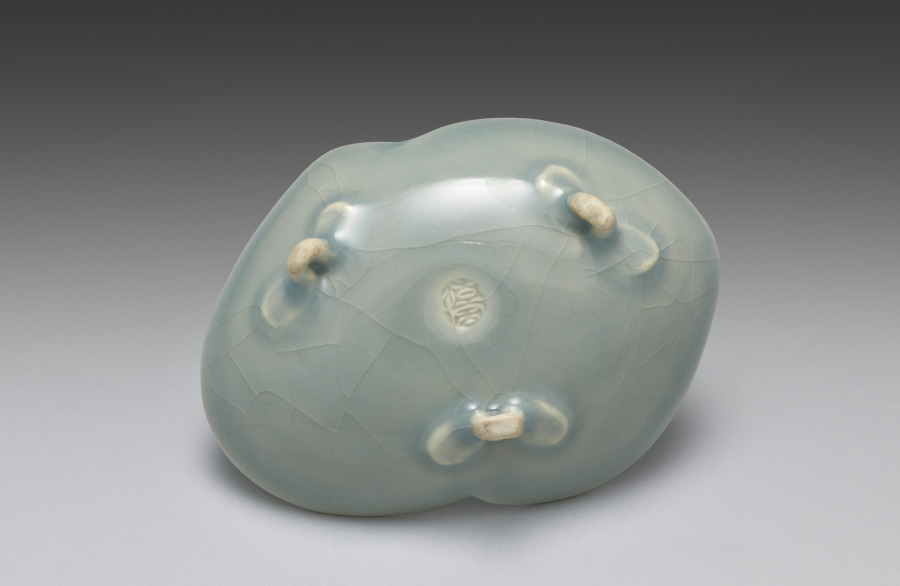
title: Dish from Saucers with Matching Shells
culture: Japan, Meiji period (1868–1912)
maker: Seifū Yohei III (Japanese, 1851–1914)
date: 1893–1914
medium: Porcelain with molded design and green crackled glaze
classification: Ceramic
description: Yohei III’s main output for his sophisticated clientele was in the form of tea sets and dining sets. He created a range of dishes in green glazes. He often produced in pairs, sets of five, or sets of ten. The set of five dishes with a more complex form is described as having a “water-colored glaze” (mizuiroyū). These are shaped like clam half shells, a reference to a game in which shell halves painted with narrative scenes or a variety of motifs must be matched back together by the players. The dishes have molded details to articulate the shell forms, and the crackling across each shell adds another dimension to the surface. Each dish is set on three small feet, formed by a pinched piece of clay and attached to an unglazed area on the underside of the dish. Curiously, while four of the dishes are stamped with the artist’s mark, one has instead a signature carved into the base.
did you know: Each of the paired-shell dishes has its own compartment in a long, flat box.